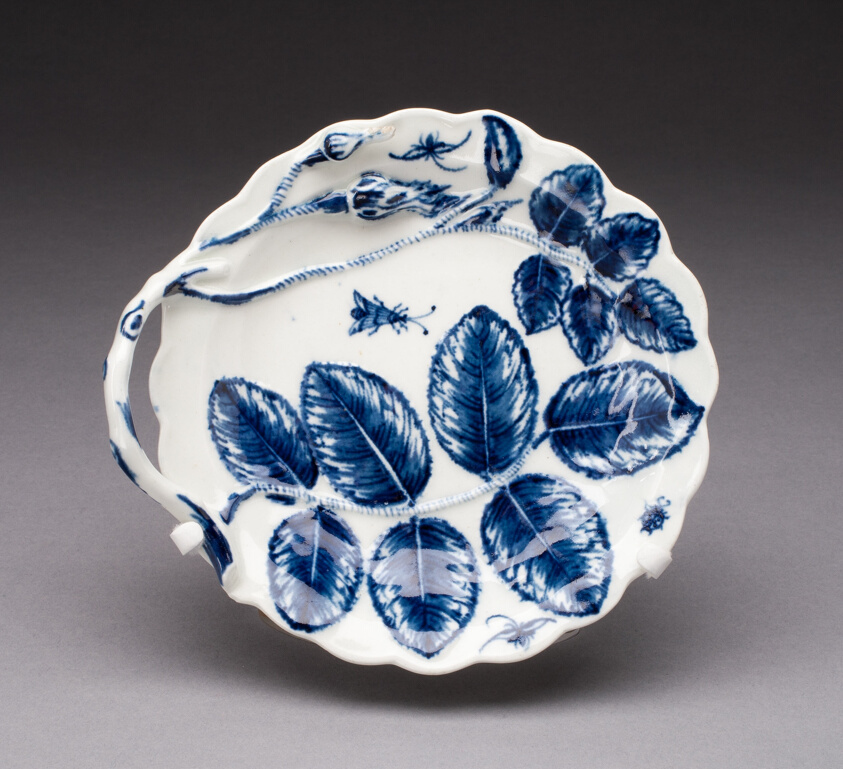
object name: Ceramics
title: Sweetmeat Dish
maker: Worcester Porcelain Factory (Warmstry House Period, 1751–1783); Worcester, England, founded 1751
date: c. 1765/70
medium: Soft-paste porcelain, underglaze blue decoration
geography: Worcester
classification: dish (vessel); tableware; porcelain; european decorative arts; ceramics